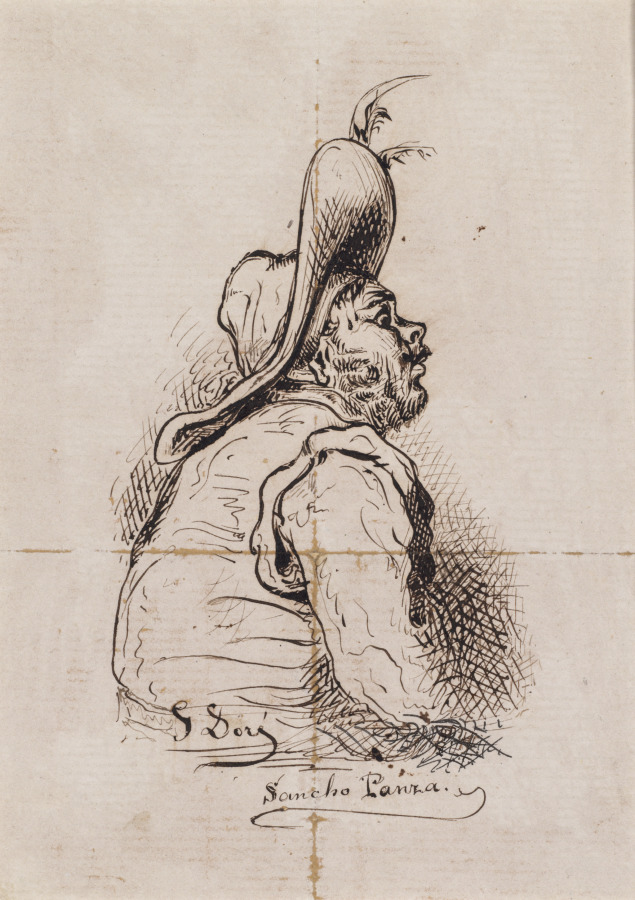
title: Sancho Panza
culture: France, 19th century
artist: Gustave Doré (French, 1832–1883)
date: c. 1863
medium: Pen, brown ink, black ink on modern laid paper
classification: Drawing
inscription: Lower center, in black/brown ink: “G Doré / Sancho Panza”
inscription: Verso, upper right, in pencil: “Goodman / 9086”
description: This image is one of a large group of illustrations that French artist Gustave Doré made for an 1863 edition of Miguel de Cervantes’s novel Don Quixote, originally published in 1605. It depicts Sancho Panza, the humorous sidekick of the novel’s hero. Placed at the end of a chapter in the book, this vignette emphasizes Sancho’s stocky form and curiosity, as he looks forward attentively.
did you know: This drawing is one of almost 400 that Gustave Doré created to illustrate Don Quixote.